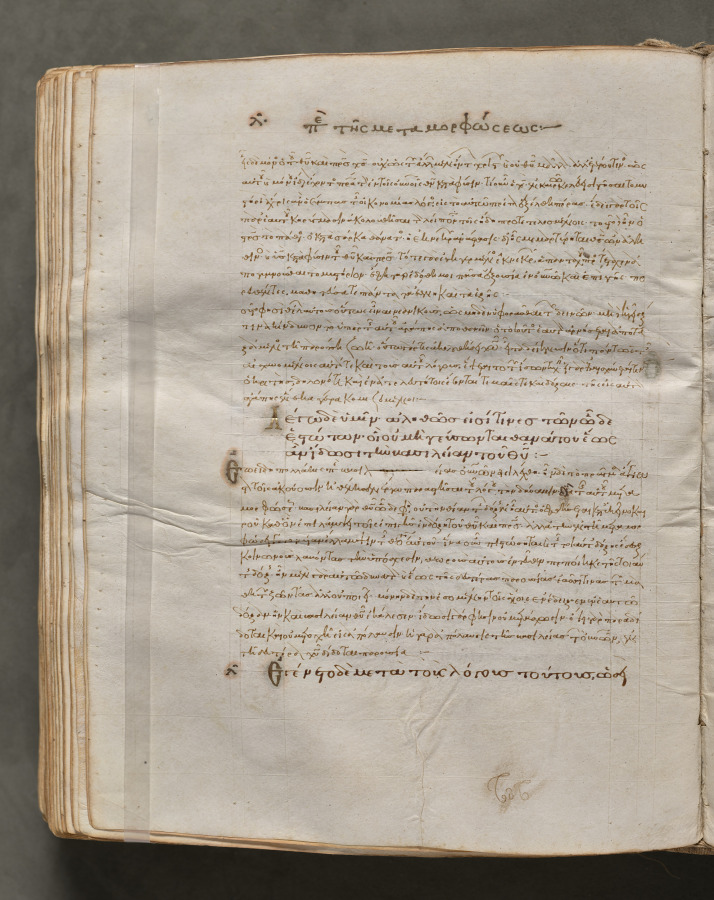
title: Text, folio 247 (verso), from a Gospel Book with Commentaries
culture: Byzantium, Constantinople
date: c. 1000–1100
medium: ink, tempera, and gold on vellum; leather binding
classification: Bound Volume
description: Each of the four gospels in this book opens on a page with brilliantly illuminated borders depicting the author of the text as well as birds—principally peacocks, symbols of the immortality of the soul—and fountains, representing the fountain of life and the salvation of the soul. This volume consists of 428 leaves with texts in Greek. Its level of sophistication suggests that it was probably written and decorated in a monastery in Constantinople.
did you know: Gospel books were carried in procession through Byzantine churches.